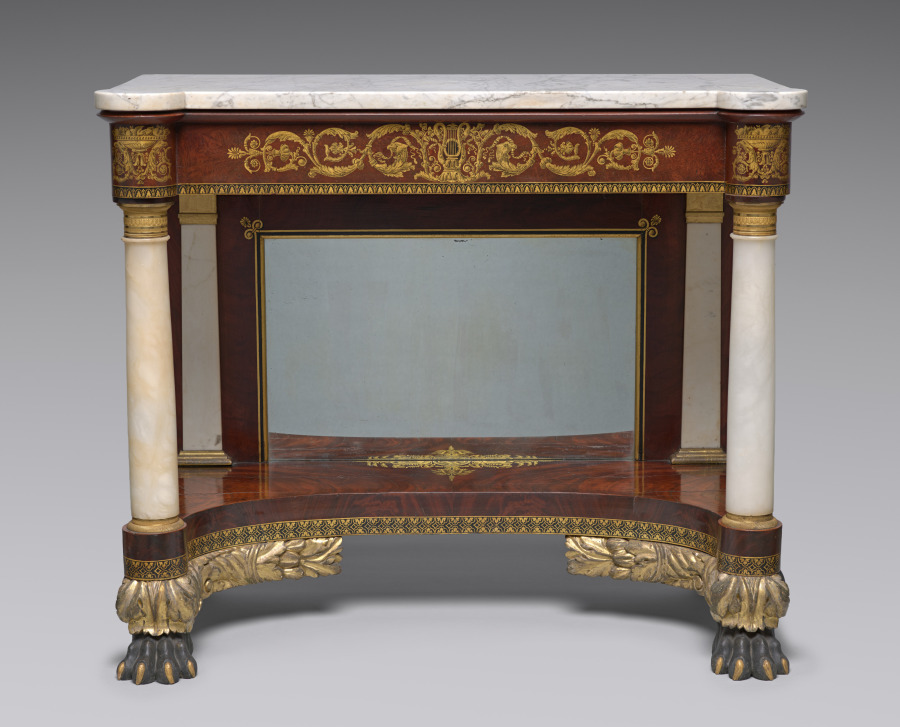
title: Pier Table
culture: America, New York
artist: Joseph Meeks and Sons (American)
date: c. 1829–35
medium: mahogany; marble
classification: Furniture and woodwork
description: Ornamental tables such as this marble-topped example were most often used in rooms on a narrow wall between two windows or just across from them on an opposite wall. Usually a gilded mirror hung above the table to create a single pier of glass, top to bottom, which reflected light around the room. This table’s bold use of carved and stenciled decoration, as well as expensive white marble, indicate that it was owned by a very wealthy family.